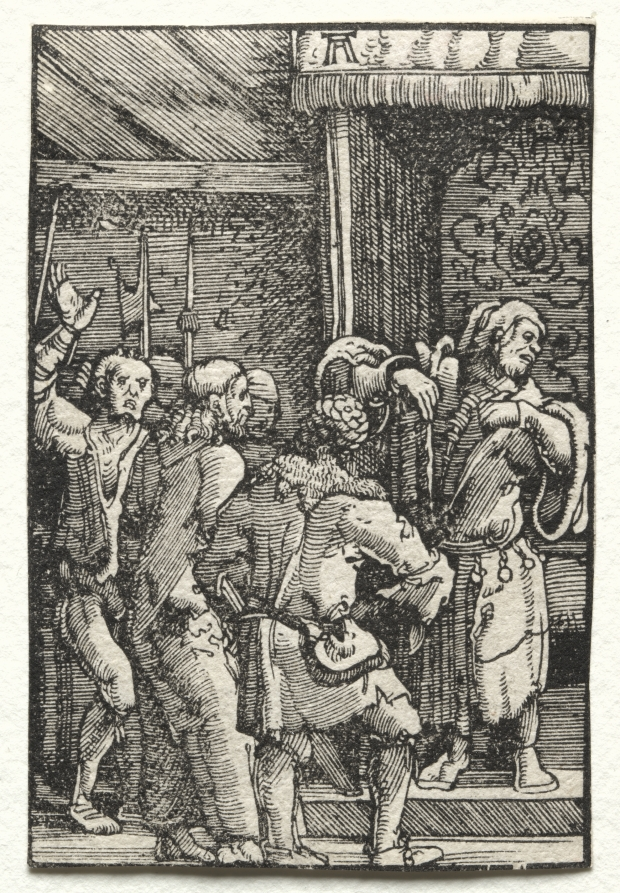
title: The Fall and Redemption of Man: Christ before Caiaphas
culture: Germany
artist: Albrecht Altdorfer (German, c. 1480–1538)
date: c. 1515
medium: woodcut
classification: Print